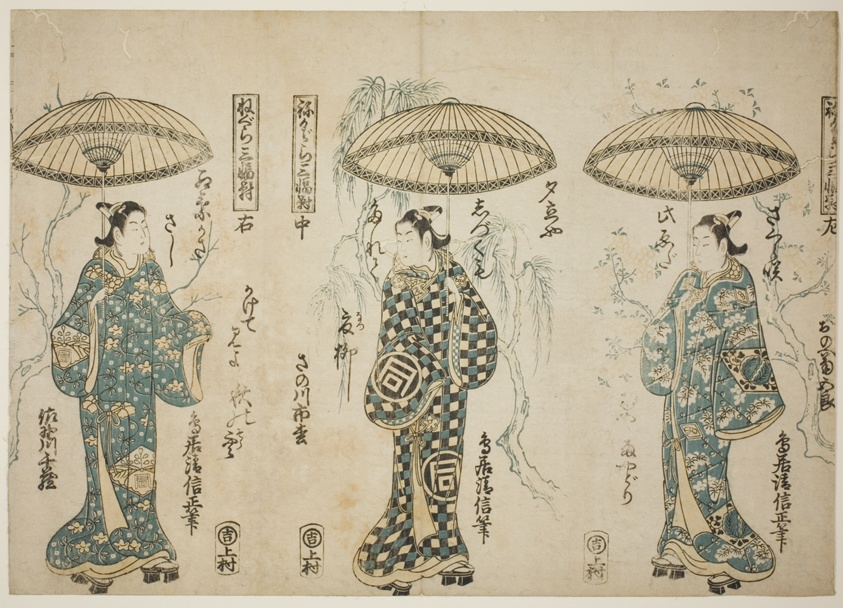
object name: Print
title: The Actors Onoe Kikugoro I (right), Sanogawa Ichimatsu I (center), and Sanogowa Senzo (left), from the triptych "Negura sanpukutsui"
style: Japanese (culture or style)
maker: Torii Kiyonobu II (Japanese, active c. 1725-61)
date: c. 1748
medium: Color woodblock print; hosoban triptych, benizuri-e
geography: Japan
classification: woodblock print; print; asian art